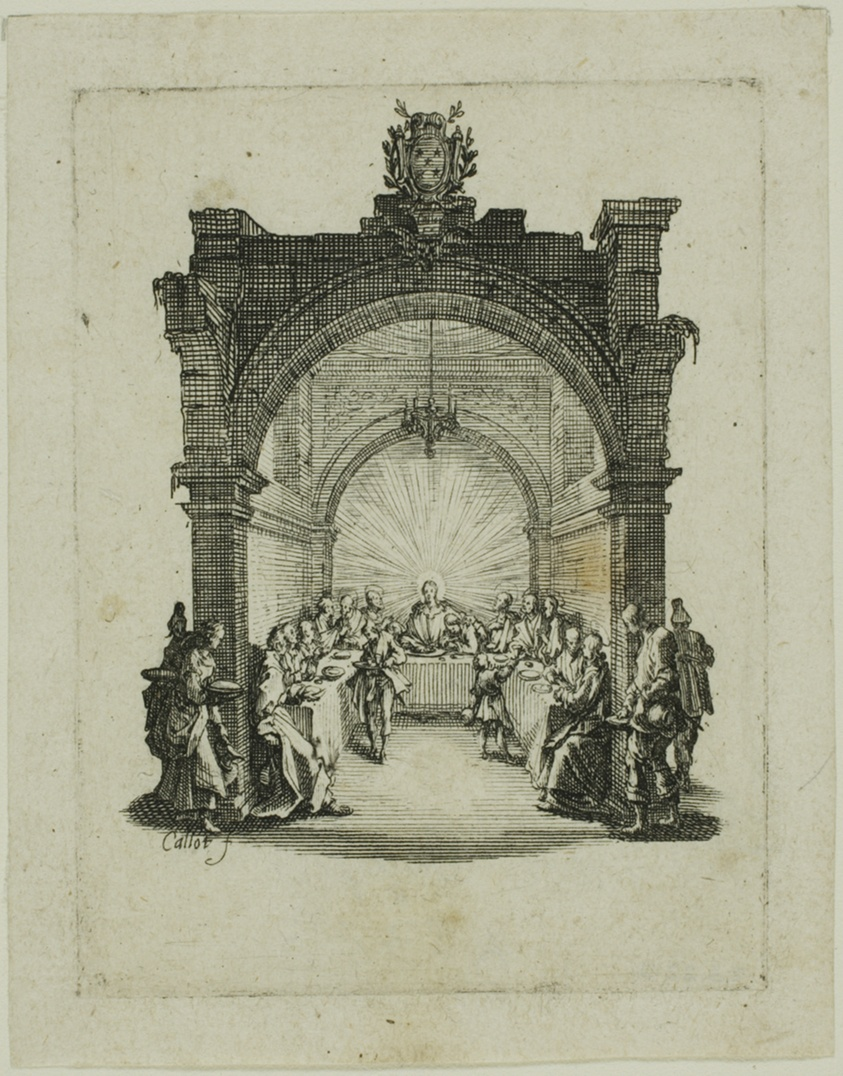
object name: Print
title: The Last Supper, from The Small Passion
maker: Jacques Callot (French, 1592-1635)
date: 1624/31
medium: Etching on ivory laid paper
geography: France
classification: etching; print; prints and drawing